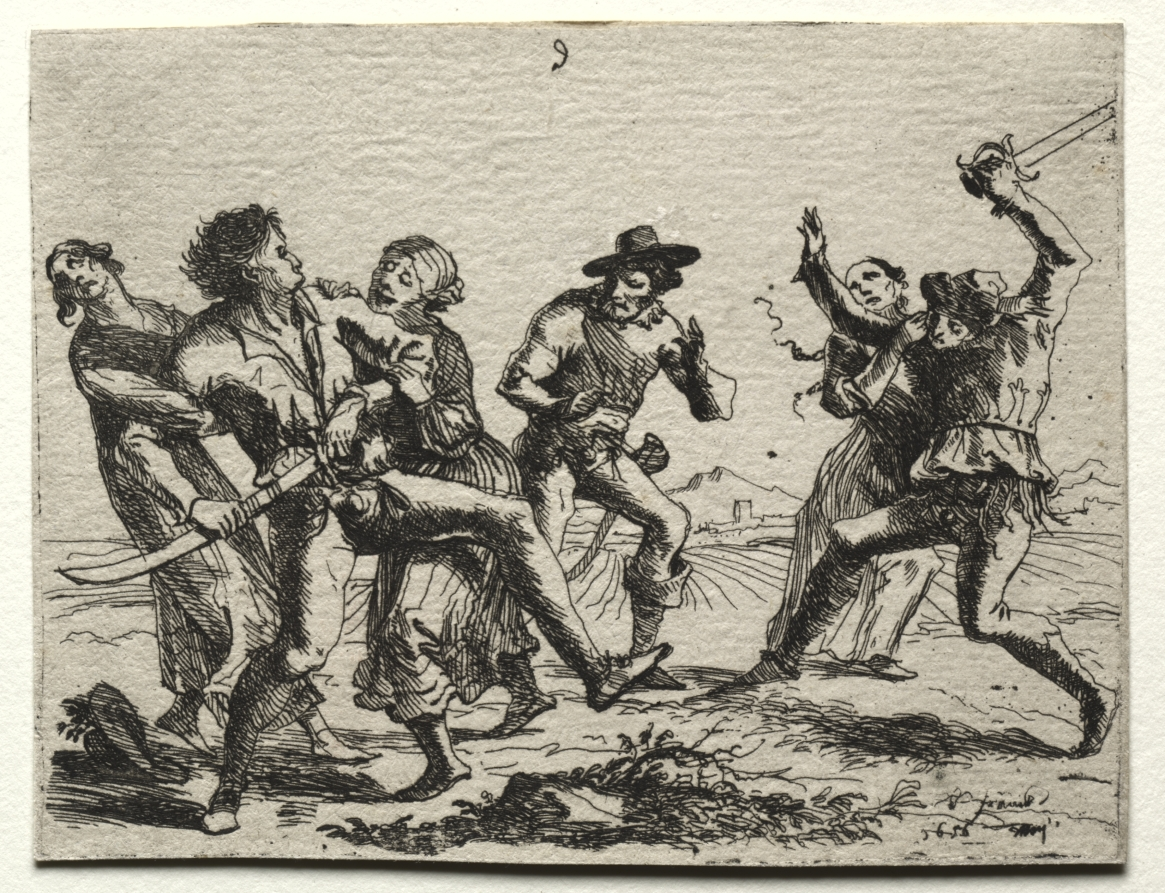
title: Military Subjects: A Quarrel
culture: Germany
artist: Hans Ulrich Franckh (German, 1603–1680)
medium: etching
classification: Print